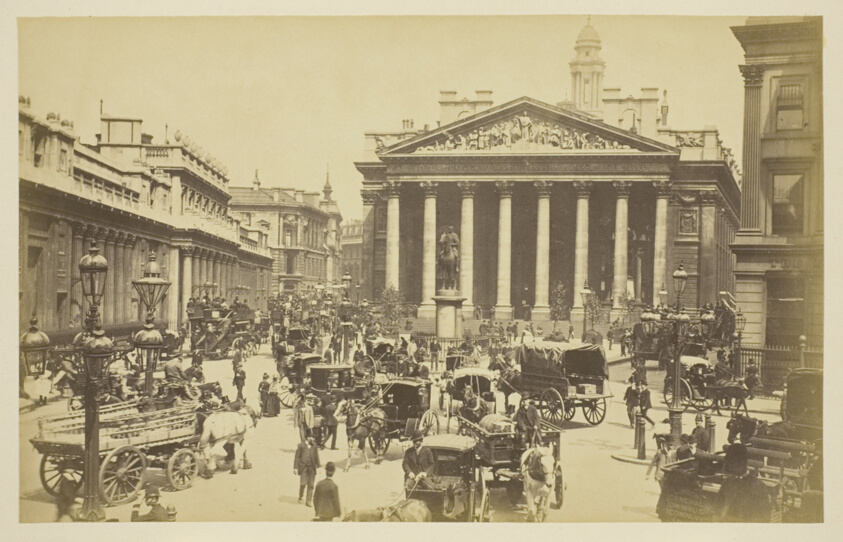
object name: Photograph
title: The Royal Exchange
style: 19th century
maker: Artist unknown; probably English, 19th century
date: 1850–1900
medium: Albumen print, from the album "Views of London"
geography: England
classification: albumen silver print; photographic process; photography; photograph